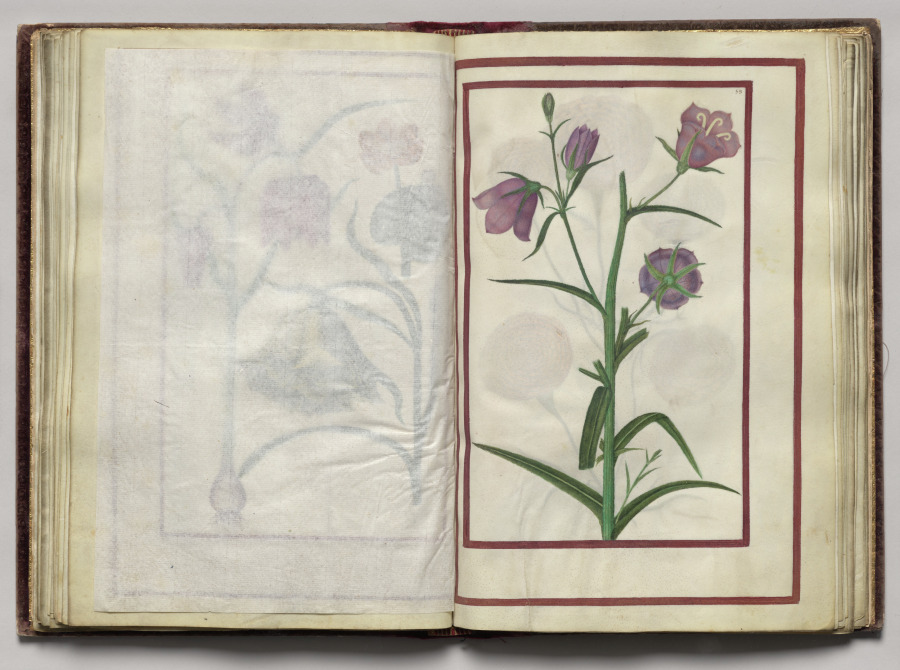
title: Campanula, folio 27 (recto), from Florilegium (A Book of Flower Studies)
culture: France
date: 1608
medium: watercolor, ink, silver, and gold over occasional traces of pencil, on vellum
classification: Bound Volume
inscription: Dated: Poitiers 1608 (on frontispiece) Signed: On frontispiece in black ink, lower right: Van Kuyk Notation on drawing: Frontispiece: in pencil, lower margin: * élève de Van Kessel, peintre flammand (* in pencil also appears in front of Van Kuyk's name).